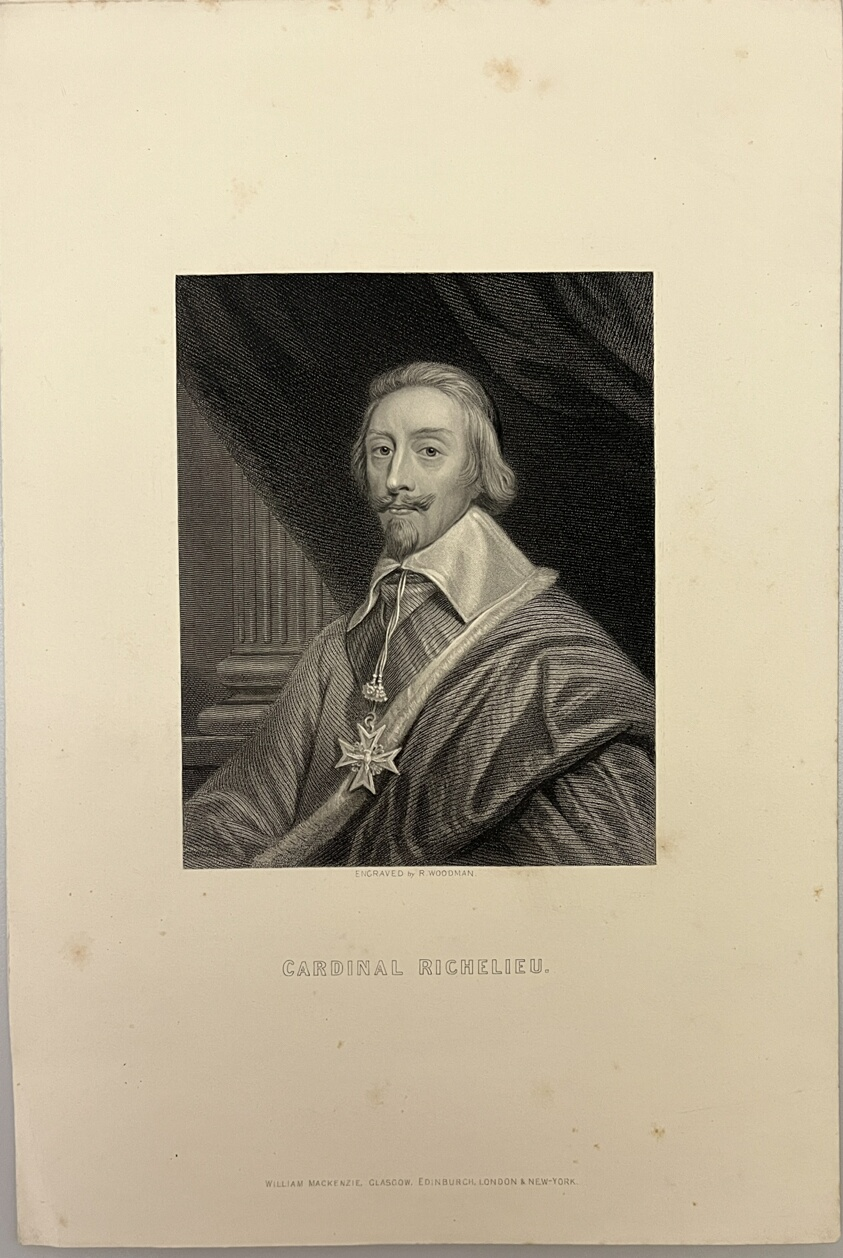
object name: Print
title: Cardinal Richelieu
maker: Richard Woodman (English, 1784-1859)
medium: Stipple engraving on paper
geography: United Kingdom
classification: reproduction; print; prints and drawing